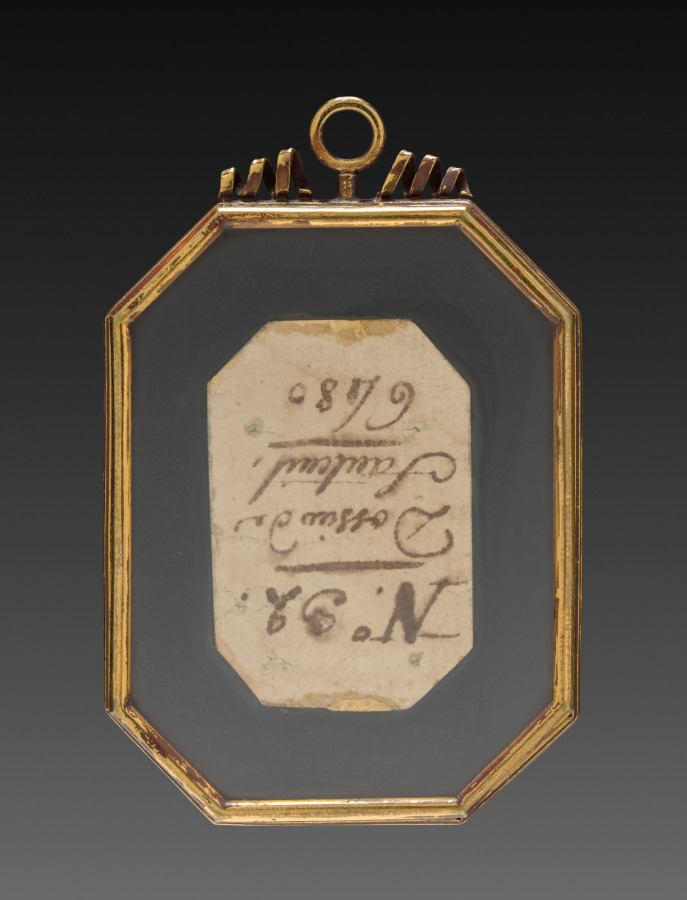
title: Locket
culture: France, 18th century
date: 1700s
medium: gold and crystal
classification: Jewelry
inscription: "No. 32./ Dossin de/ Fauteuil/ 6480."